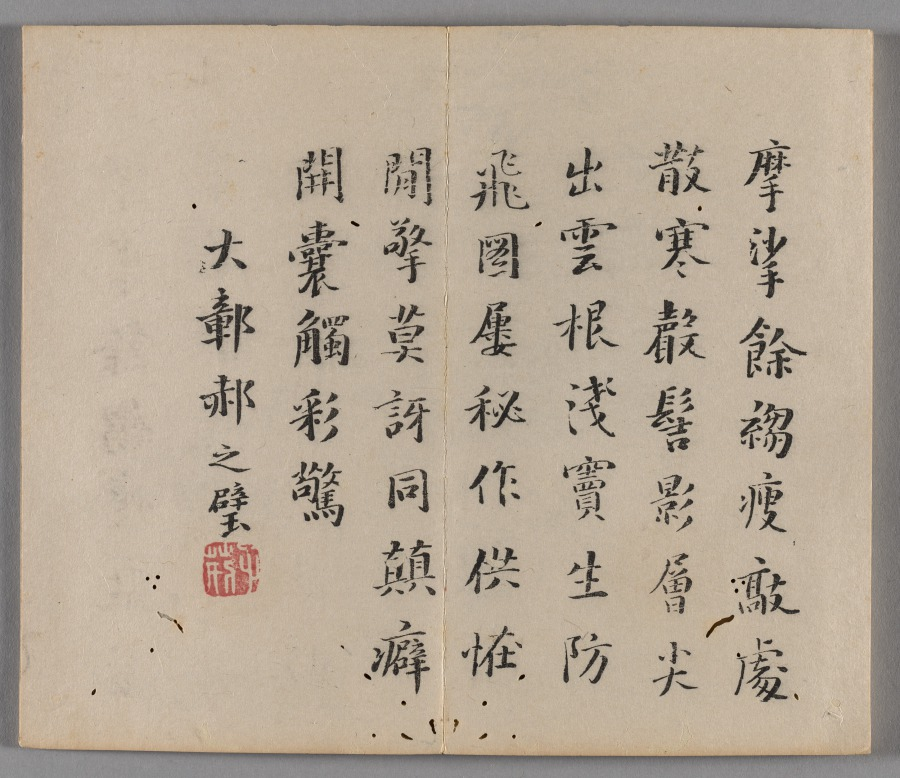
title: Ten Bamboo Studio Painting and Calligraphy Handbook (Shizhuzhai shuhua pu): Rocks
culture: China, Qing dynasty (1644-1911)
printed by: Hu Zhengyan (Chinese, c. 1584–1674)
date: 1633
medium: Woodblock-printed book; ink and colors on paper; first edition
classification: Print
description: Color printing reached a level of perfection in the early 1600s, as seen in this Ten Bamboo Studio Collection of Calligraphy and Painting and the Mustard Seed Garden Manual of Painting (printed 1679 and 1701). The painterly quality, precision in registering (aligning) the woodblocks, and harmonious colors made them the most successful color print editions in Chinese history. Both editions were printed and compiled in Nanjing, spread nationwide, and had a great impact on the arts in Japan and Korea.